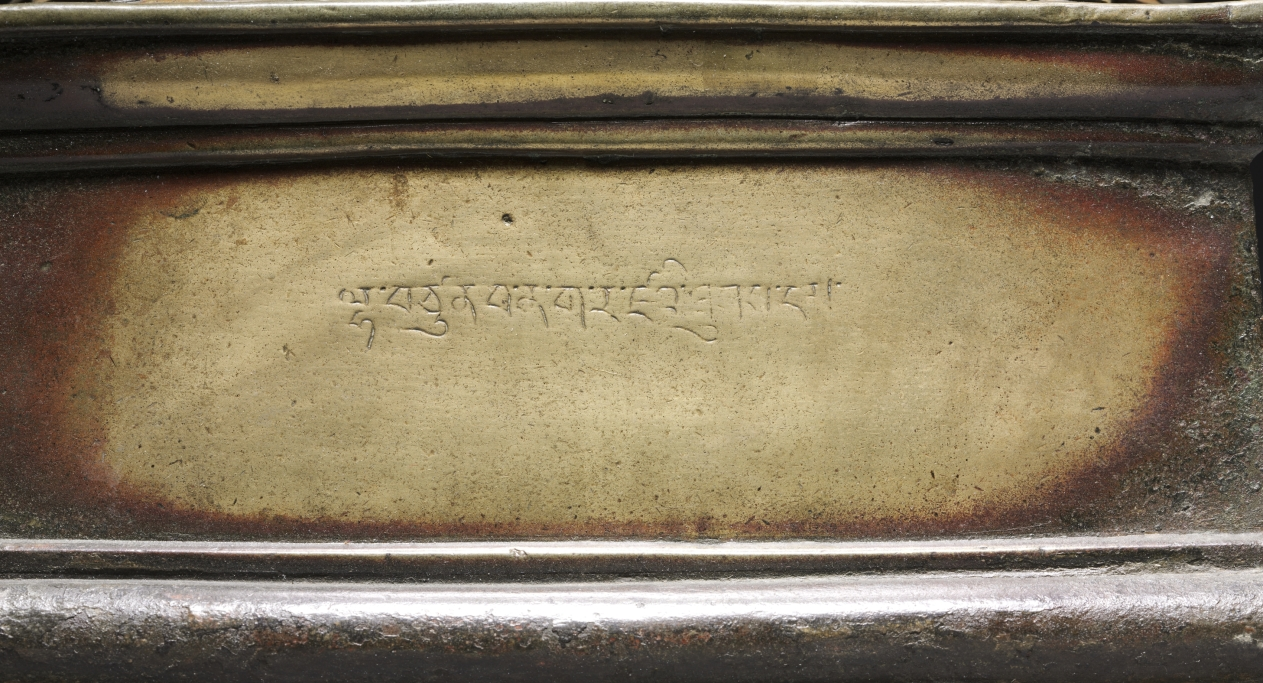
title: Standing Buddha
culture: India, Kashmir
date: c. 900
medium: brass with silver and copper inlay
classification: Sculpture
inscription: inscribed with the name of the monk who owned it: Lhatsun Nagaraja (active from c. 998 to 1026)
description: The slender athletic Buddha extends one foot slightly off the lotus pedestal, suggesting his humanity enters our world from his transcendent state. With his right hand he signals that we should have no fear. The smooth signs of wear on the sculpture indicate that it was worshiped in Kashmir, where water and other ablutions were poured over sacred images during rituals. The Tibetan inscription on the pedestal states that it belonged to a royal monk named Nagaraja (Tibetan, active about 998–1026). Sculptures like this contributed to the transmission of Buddhism from India to Tibet and served as artistic models.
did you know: The Buddha grasps the end of his robe in his left hand.